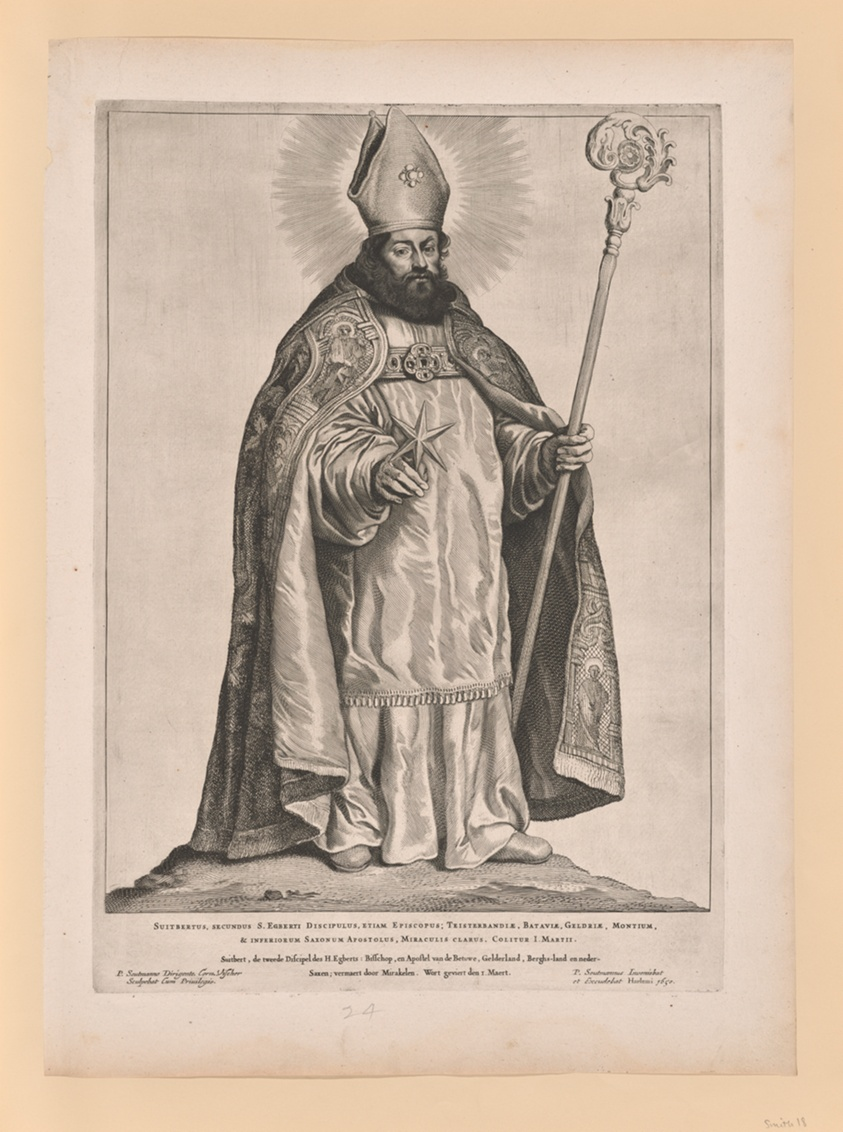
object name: Print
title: Saint Frederick of Utrecht, from Saints of the North and South Netherlands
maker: Cornelis Visscher (Dutch, c. 1629-1658); after Pieter Claesz. Soutman (Dutch, c. 1580–1657)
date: 1650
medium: Etching and engraving on paper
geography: Netherlands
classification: engraving; paper; print; prints and drawing